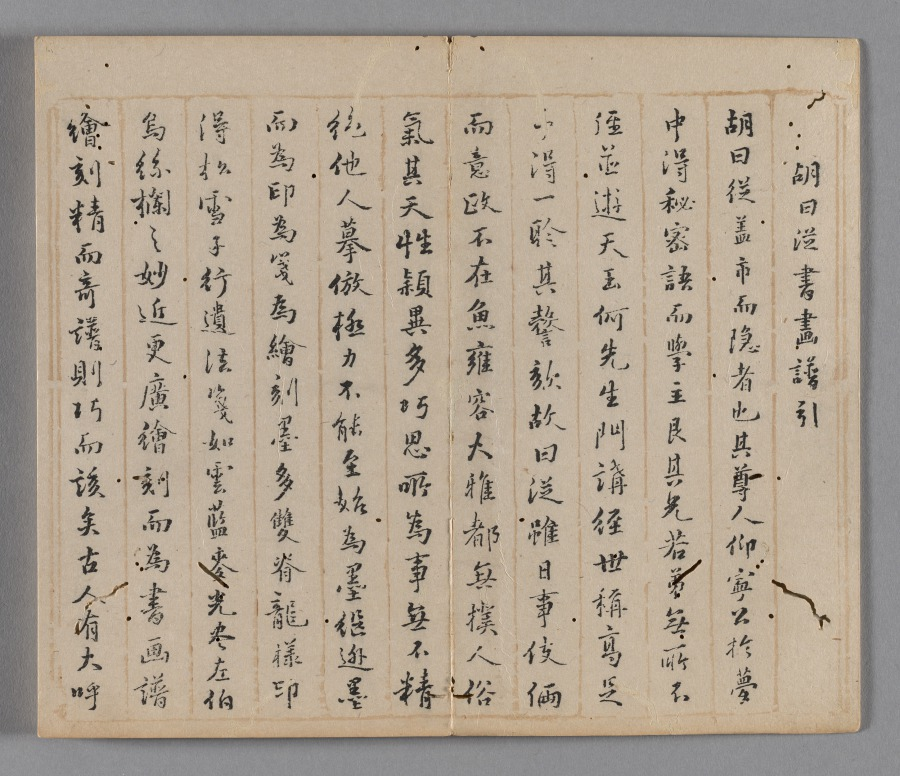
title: Ten Bamboo Studio Painting and Calligraphy Handbook (Shizhuzhai shuhua pu): Miscellaneous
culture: China, Qing dynasty (1644-1911)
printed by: Hu Zhengyan (Chinese, c. 1584–1674)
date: 1633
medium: Woodblock-printed book; ink and colors on paper; first edition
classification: Print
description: Color printing reached a level of perfection in the early 1600s, as seen in this Ten Bamboo Studio Collection of Calligraphy and Painting and the Mustard Seed Garden Manual of Painting (printed 1679 and 1701). The painterly quality, precision in registering (aligning) the woodblocks, and harmonious colors made them the most successful color print editions in Chinese history. Both editions were printed and compiled in Nanjing, spread nationwide, and had a great impact on the arts in Japan and Korea.